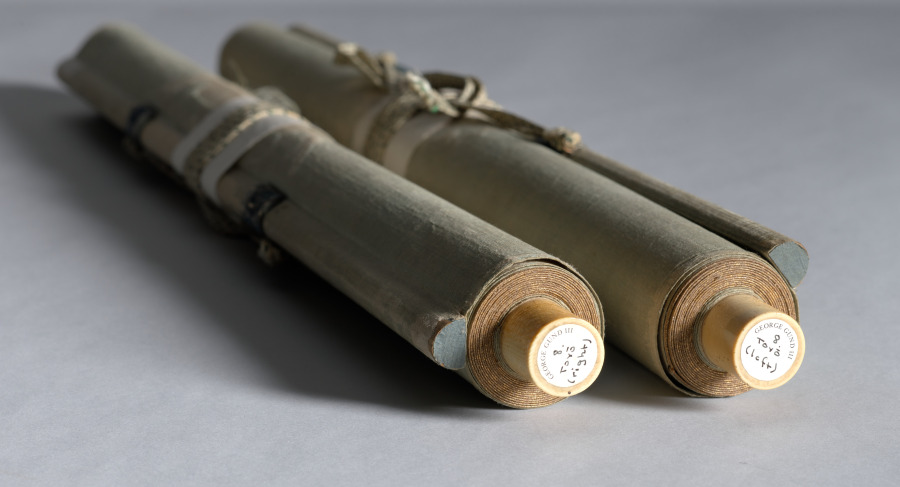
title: Landscapes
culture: Japan, Edo period (1615–1868)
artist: Unkoku Tōyo (Japanese, 1612–1688?)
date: mid- to late 1600s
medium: pair of hanging scrolls; ink and light color on paper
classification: Painting